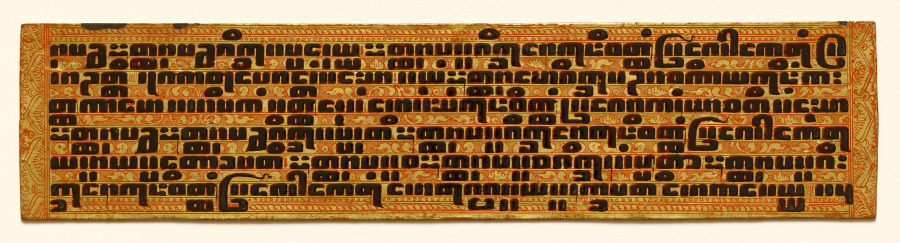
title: Text, folio 15 (recto) from a Kammavacha: Buddhist ordination text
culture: Myanmar (Burma)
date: 1800s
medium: Leaf: lacquer and gilding on cloth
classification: Manuscript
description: In premodern Burma, lay people commissioned lavishly ornamented manuscripts for ceremonial occasions, when officiants would read aloud from the text. Written in black lacquer, the text is in the language of Pali written in a Burmese script. It contains ordination rites and procedures for monastic ceremonies. The second to last page is covered with intricately drawn, winged celestial beings (nats) in gestures of praise. They fly amid intertwining vegetation—denoting bounty—that grows from serpentine forms that refer to rain clouds. Lionlike forms inhabit the space with them. The top and bottom covers are equally ornamented with jeweled floral patterning.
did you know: The Pali text of this manuscript is written in Burmese square script, which is also known as "tamarind seed script."